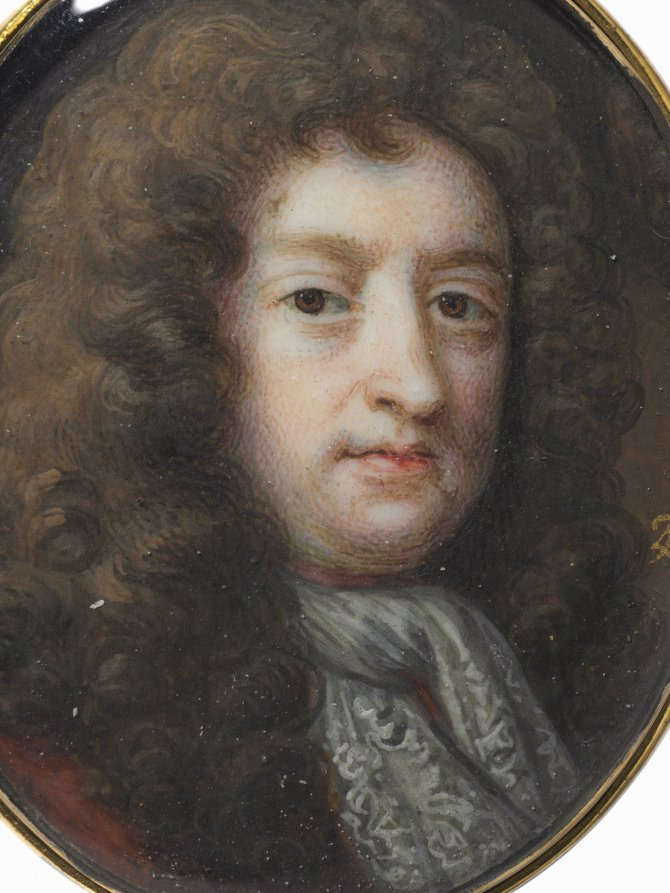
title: Portrait of Samuel Butler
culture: England, early 18th century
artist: Bernard Lens (British, 1681–1740)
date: c. 1715–20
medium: watercolor on ivory in a period metal frame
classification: Portrait Miniature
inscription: signed right: BL [in monogram]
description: Bernard Lens III was the most renowned member of an artist dynasty. His namesake father was a printmaker, his grandfather a painter, and two of his own sons became artists. Lens III was a critical figure in miniature painting as the art form transitioned away from painting on vellum. During the first decade of the eighteenth century, he established ivory as the primary miniature support in Britain, probably having seen the pioneering work of Rosalba Carriera (1675–1757) brought to England from Venice during the flowering of the Grand Tour. The earliest known miniatures by Lens were painted on vellum around 1707, with examples on ivory appearing shortly thereafter. Lens spent his career in London, Bristol, and Bath while also traveling to the country estates of his influential patrons. He was painter to kings George I and George II, as well as drawing instructor to princesses Mary and Louise, the Duke of Cumberland, and Horace Walpole (1717–1797). The sitter, Samuel Butler, turns slightly to the left and has brown eyes. A small portion of his dull red coat is visible, and he wears a white lace cravat twisted around his neck in a loose knot—an essential element of a gentleman’s dress that was fashionable between the 1670s and 1690s and unlike the broad lace or linen collars that dominated in the early and mid-seventeenth century. A long, brown, curled wig falls past his shoulders, and one comma-shaped curl is arranged at the center of his forehead. Butler’s voluminous wig occupies half of the painted surface. During the 1660s gentlemen regularly wore wigs, and while they offered a practical solution to such predicaments as hair loss, graying, and lice, wigs were subject to the vicissitudes of fashion. The wig style seen here is that of the late seventeenth century. Around 1680 it became the norm to part the long wig at the center, which by 1700 resulted in two pronounced tufts on either side, a style not yet exhibited in this portrait. Butler was a poet and satirist popular at the court of King Charles II (reigned 1660–1685). He is primarily remembered as the author of Hudibras, a mock-heroic epic poem satirizing Puritanism written during the English civil war and published between 1663 and 1678.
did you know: Lens often signed his work in monogram; this gold signature is well preserved on this example.